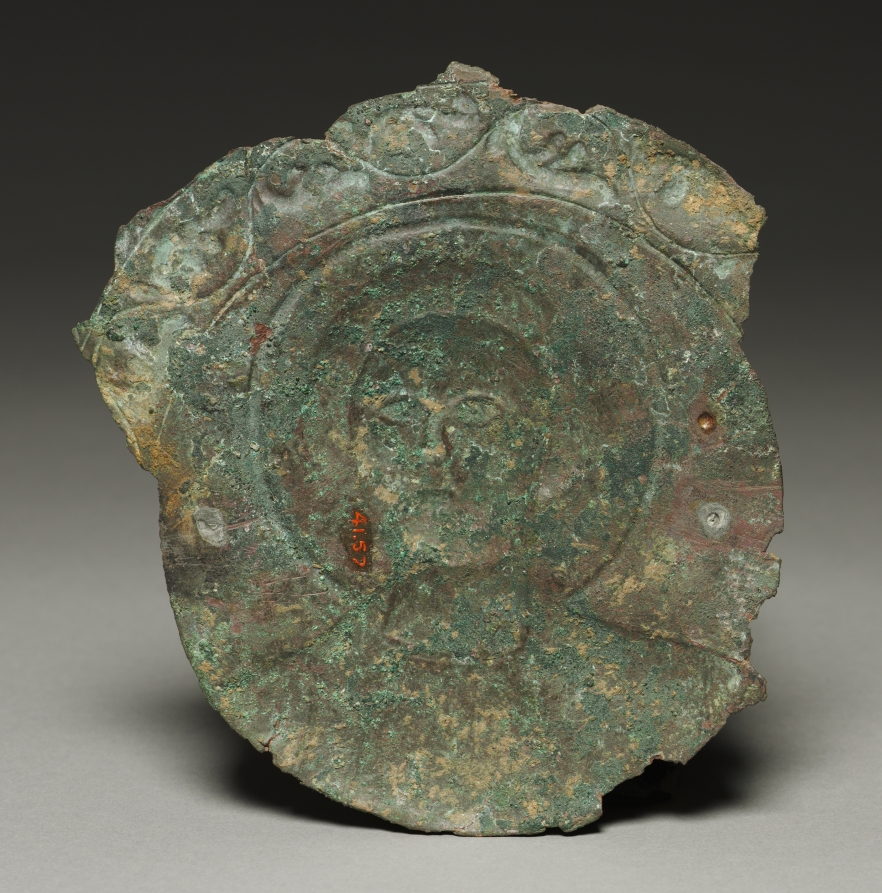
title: Door Plaque with the Head of a Saint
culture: Byzantium, Syria(?), Byzantine period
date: 500s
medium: bronze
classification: Metalwork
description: The original function of this bronze plaque is not known with certainty. It was probably once gilded and may have been affixed to a wooden.